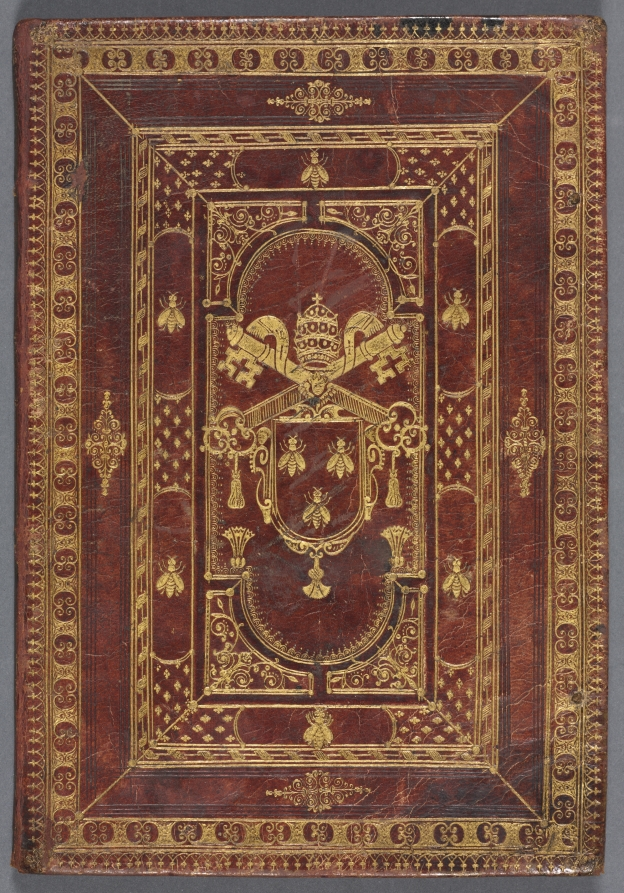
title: Relatio on Saint Elizabeth of Portugal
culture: Italy, Rome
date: c. 1625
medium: manuscript on paper bound in leather with gilt decoration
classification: Manuscript